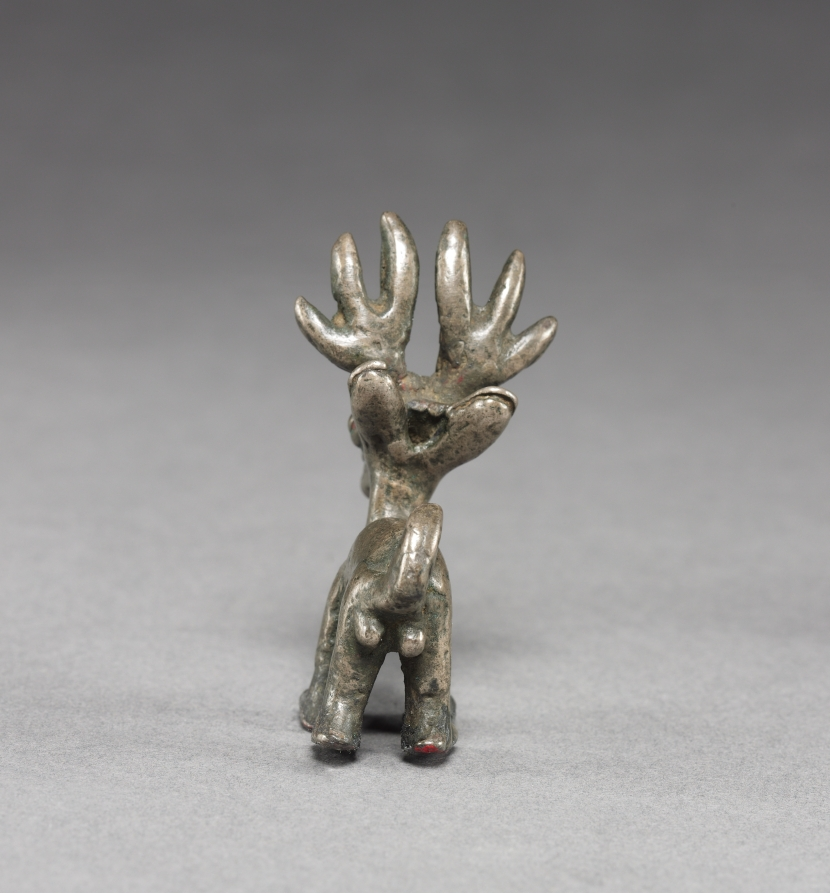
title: Deer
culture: Peru, Ica Valley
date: 1000–1532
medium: silver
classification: Metalwork